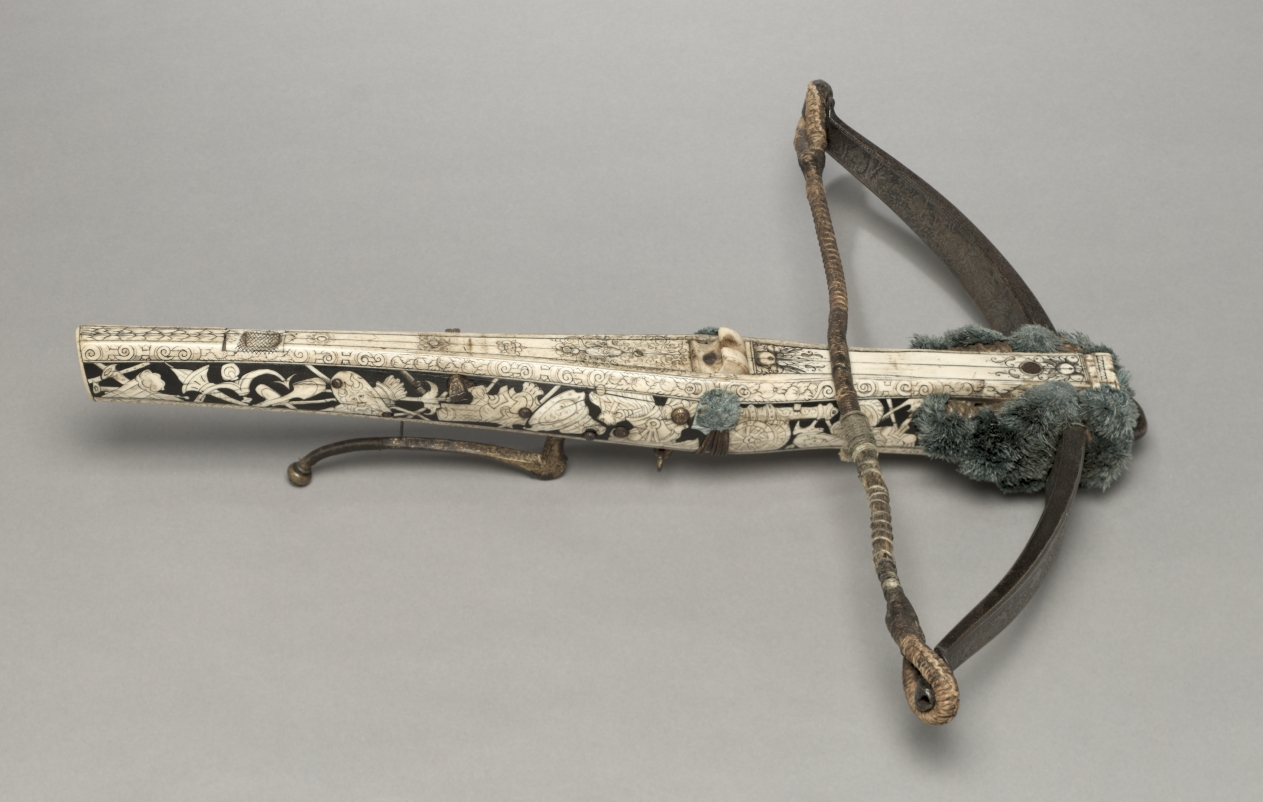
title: Crossbow of Elector Augustus I of Saxony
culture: Germany, Saxony, 16th century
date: c. 1553–73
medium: wood (walnut?), bone veneers, flax cord, steel (etched, traces of gilding). woolen pompoms, stock decorated wih inlaid trophies of arms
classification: Arms and Armor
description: This crossbow was a hunting weapon for Prince Elector Augustus I, a member of the ruling elite in the Holy Roman Empire. Augustus, powerful and wealthy, had even the most practical instruments ornately decorated, including this crossbow and its cranequin, or winding device.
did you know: Augustus was a marksman who took part in crossbow competitions. He had a large collection and often gave them to friends.